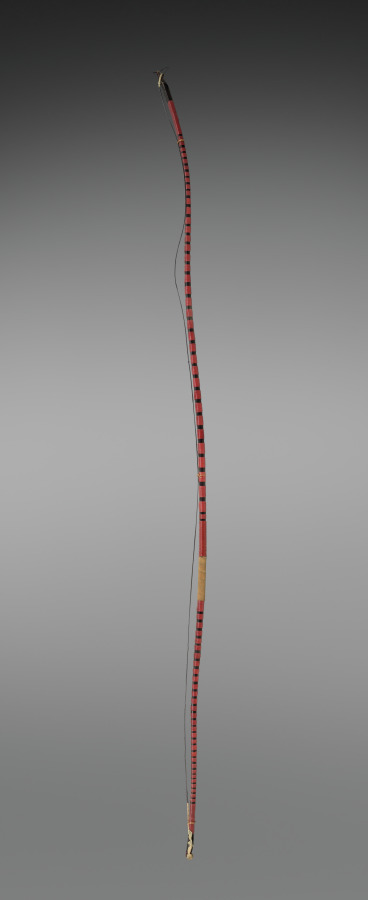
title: Bow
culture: Japan, Edo period (1615–1868)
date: early to mid-1800s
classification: Arms and Armor